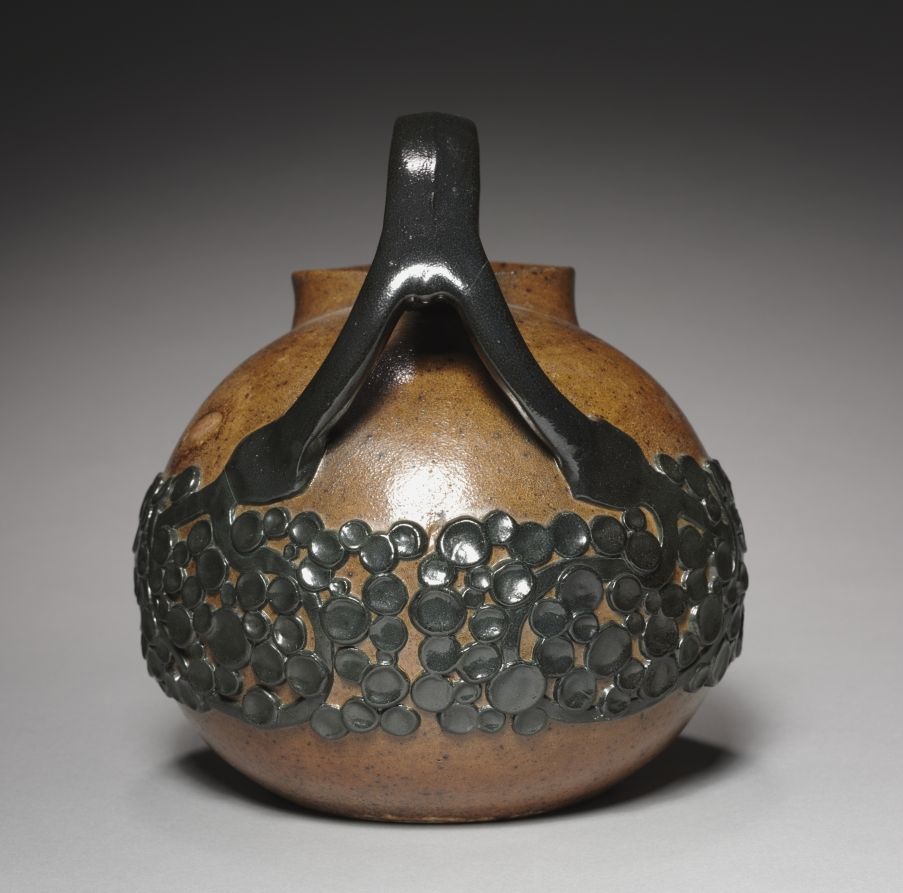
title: Pitcher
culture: Germany, Grenzhausen, early 20th Century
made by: Reinhold Merkelbach, Grenzhausen (German)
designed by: Richard Riemerschmid (German, 1868–1957)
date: c. 1900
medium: stoneware, salt-glaze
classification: Ceramic